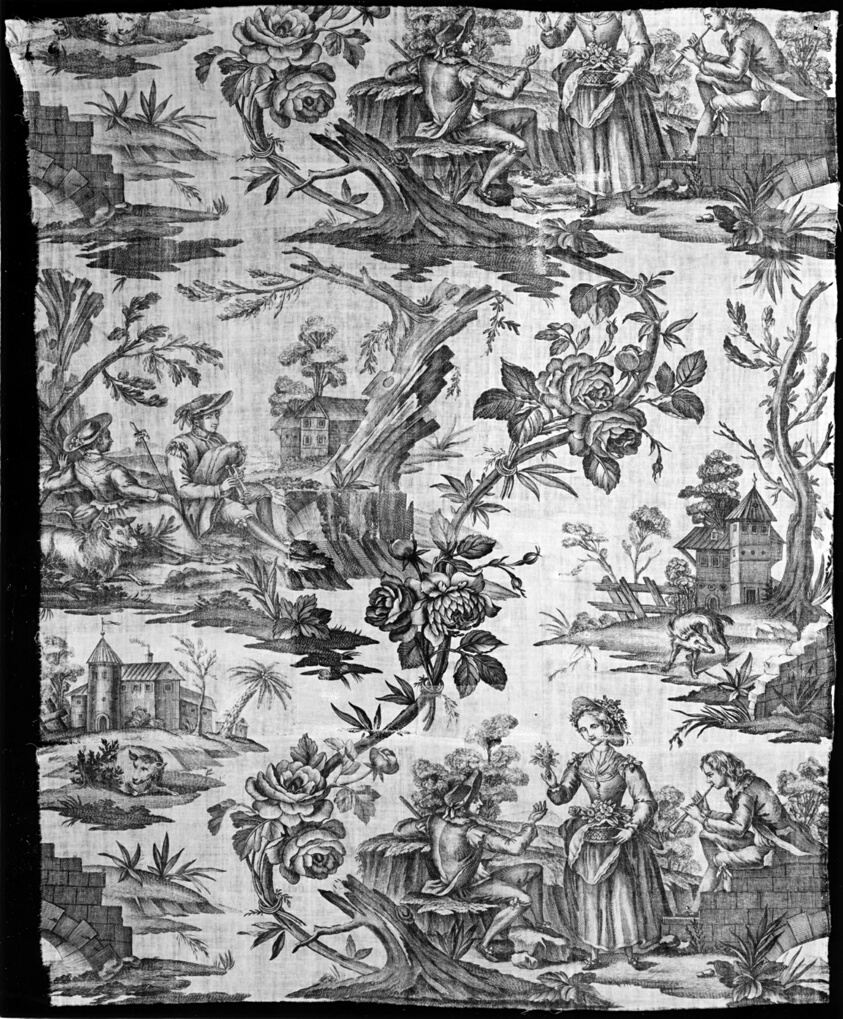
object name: Textile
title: Panel (Furnishing Fabric)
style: jouy-en-Josas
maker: Manufactured by Christophe-Philippe Oberkampf (naturalized French, 1738-1815), Oberkampf Manufactory (French, 1760-1843); Jouy-en-Josas, France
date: 1785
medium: Cotton, plain weave; copperplate printed; not quite vertical repeat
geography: Jouy-en-Josas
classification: textile; weaving - printed; furnishing textile